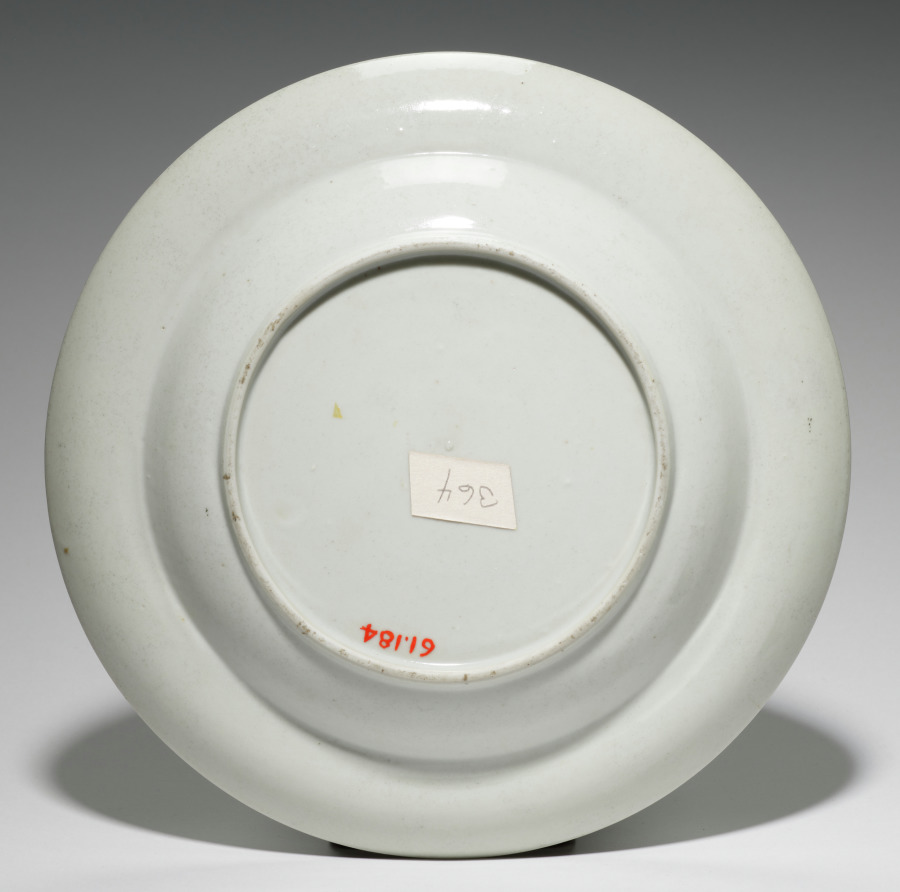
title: Soup Plate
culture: China, Chinese Export -- English or American Market (probably), 19th century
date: c. 1800–1825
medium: porcelain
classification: Ceramic